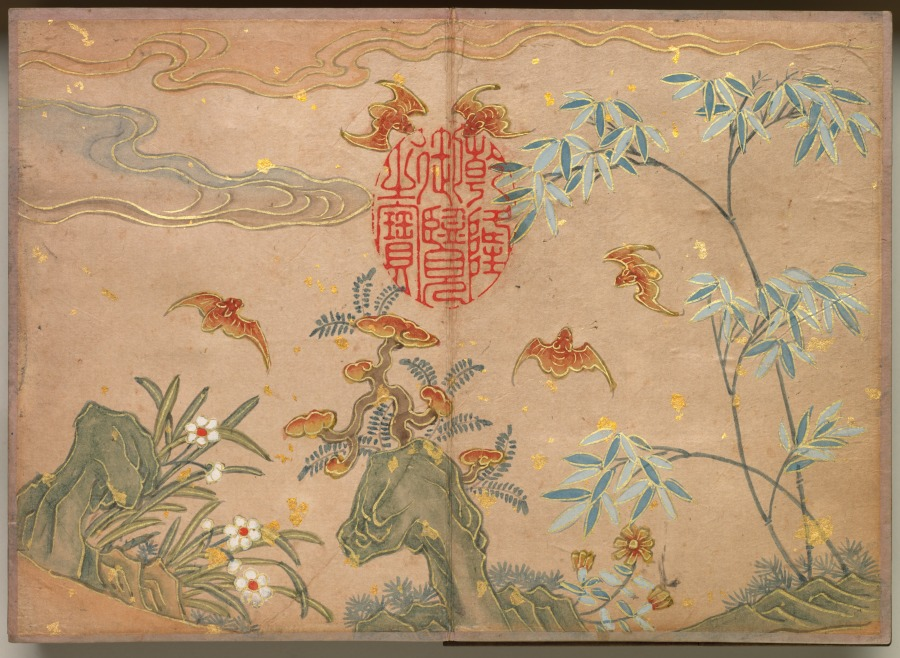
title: Desk Album: Flower and Bird Paintings (Bats, rocks, flowers oval calligraphy)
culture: China, Qing dynasty (1644-1911)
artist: Zhang Ruoai (Chinese, 1713–1746)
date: 1700s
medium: album leaf, ink and color on paper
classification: Painting